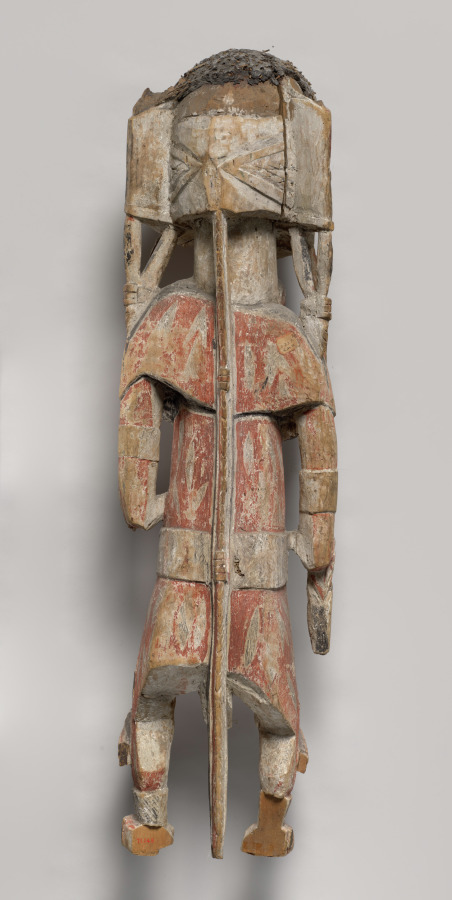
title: Malagan Memorial Festival Pole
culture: Melanesia, New Ireland, 19th century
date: 1800s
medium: painted wood, sea snail opercula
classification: Sculpture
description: At the death of an important individual in New Ireland society, villagers begin preparations for an elaborate funeral (malagan) ceremony. Food is collected for feasts, and artists are commissioned to carve elaborate sculptures and masks. Neighboring groups are invited to the ceremonies, which last for days and include speeches, dancing, music, feasts, and exchanges of goods. The ceremonies climax in the display of the elaborately carved, brightly painted art works. After the guests' departure, the malagan sculptures and masks are discarded, or sometimes stored.